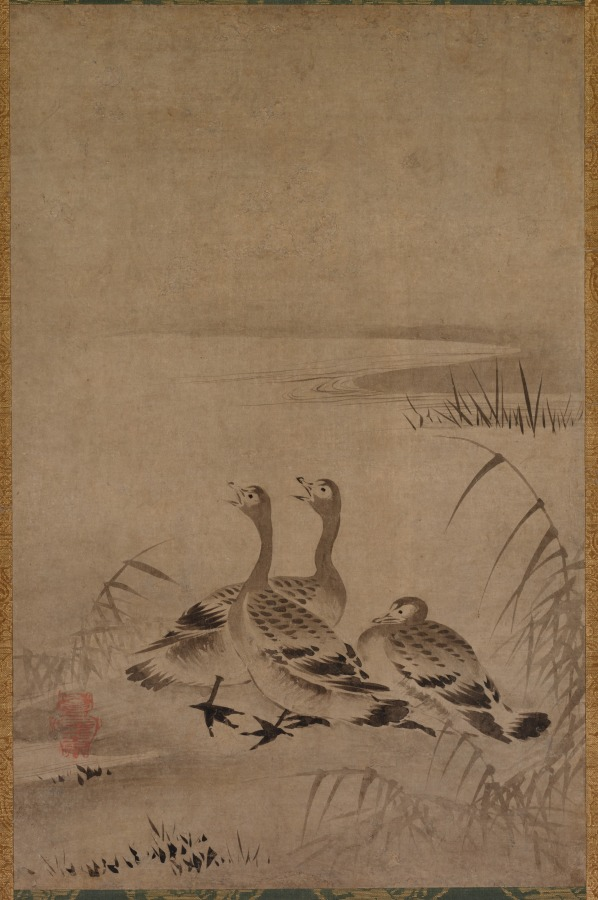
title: Wild Geese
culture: Japan, Muromachi period (1392–1573)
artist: Chōkichi (Japanese)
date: early 1500s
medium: hanging scroll; ink on paper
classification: Painting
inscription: Gourd-shaped seal of Chokichi at lower left